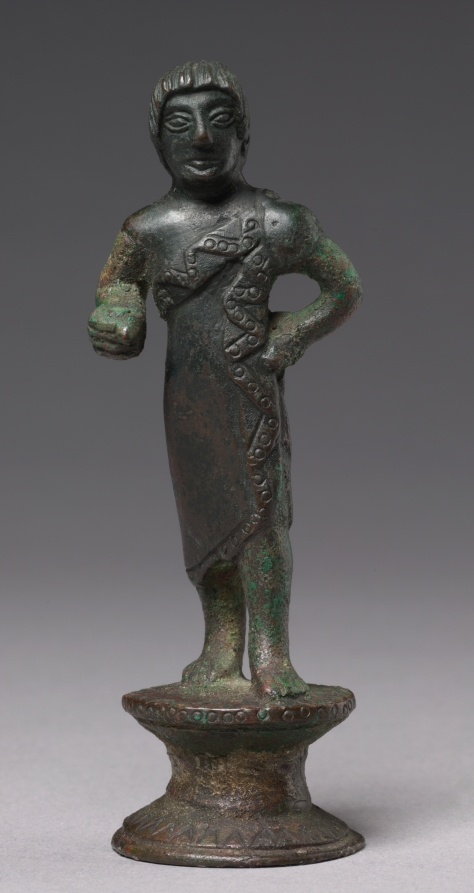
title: Statuette of a Youth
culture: Italy, Etruscan, Archaic Period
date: c. 520–500 BCE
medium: bronze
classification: Sculpture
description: Cast in one piece with its hollow base (perhaps designed to crown a candelabrum), this small bronze portrays a young man wearing a semicircular cloak adorned with punched circles along its edges. This likely represents an embroidered tebenna, an Etruscan forerunner to the Roman toga praetexta. He appears to stride forward, his right leg trailing behind and right hand extended, perhaps once holding an object.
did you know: Unusually, this figure places his hand on hip with thumb in front, fingers in back.